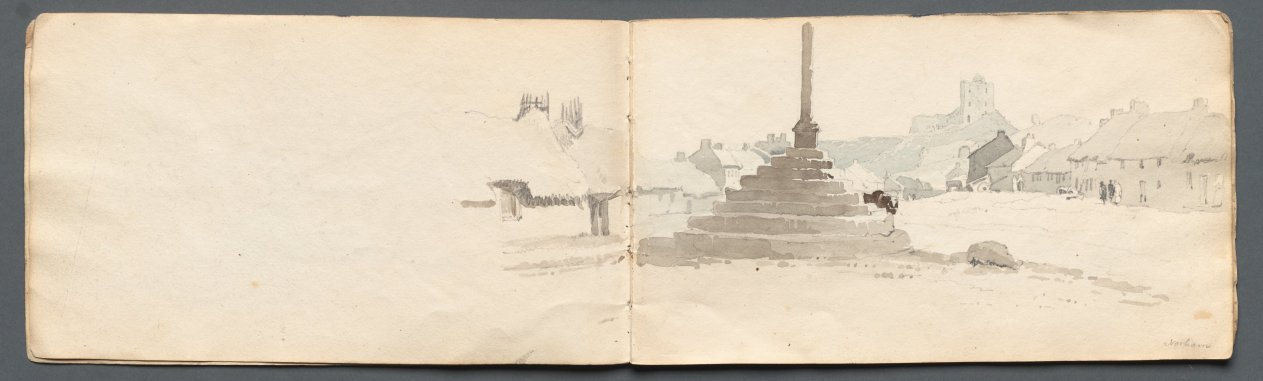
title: Sketchbook: Norham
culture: England, 19th century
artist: Samuel Prout (British, 1783–1852)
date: 1814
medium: graphite with gray and brown wash on two pages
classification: Bound Volume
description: John Ruskin (also in this gallery) admired Prout’s strength as a draftsman. Like the topographical watercolorists of the 18th century, Prout emphasized form over color in his watercolors, as is evident in the monochromatic, delicate English views in this sketchbook.